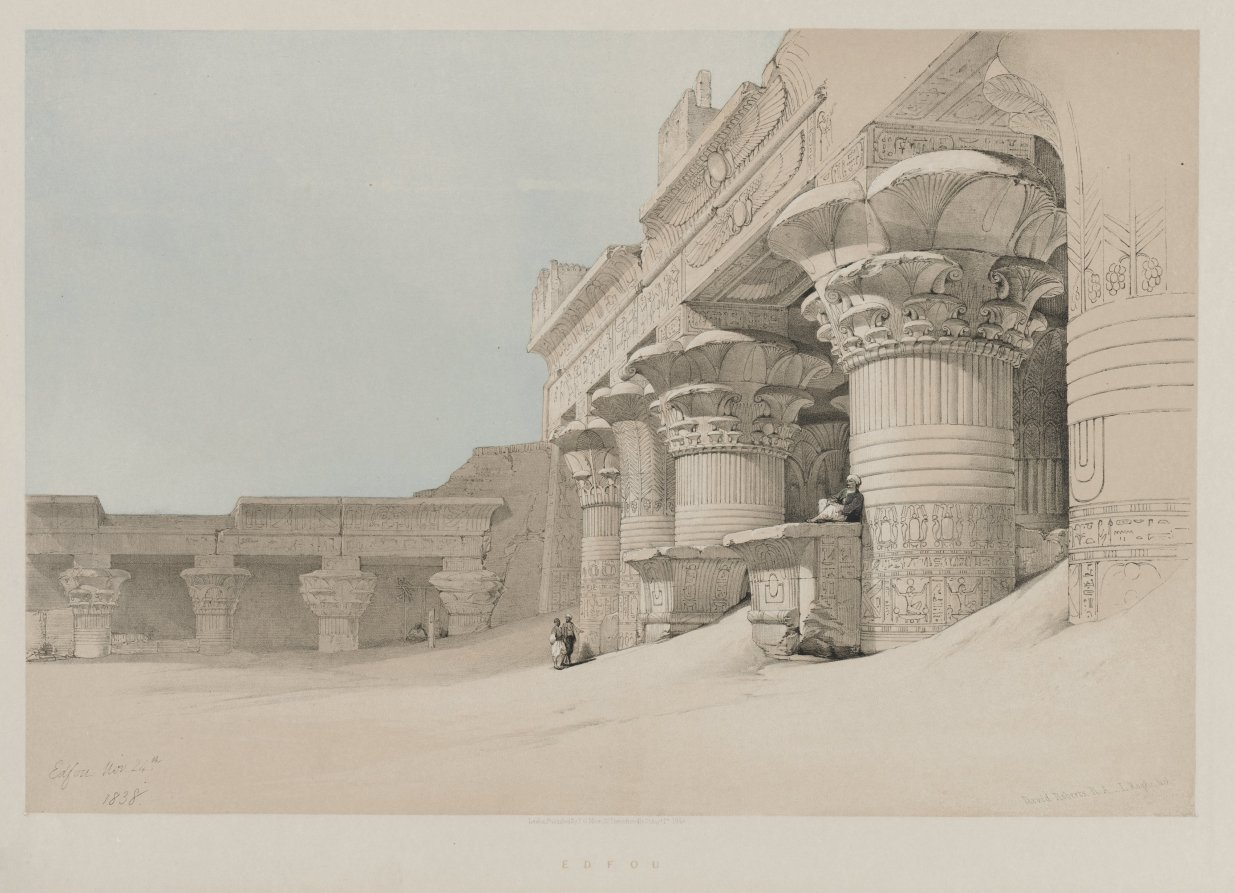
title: Egypt and Nubia, Volume II: Edfou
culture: England, 19th century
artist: Louis Haghe (British, 1806–1885)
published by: F. G. Moon, 20 Threadneedle Street, London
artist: after David Roberts (Scottish, 1796–1864)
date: 1846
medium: color lithograph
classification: Print